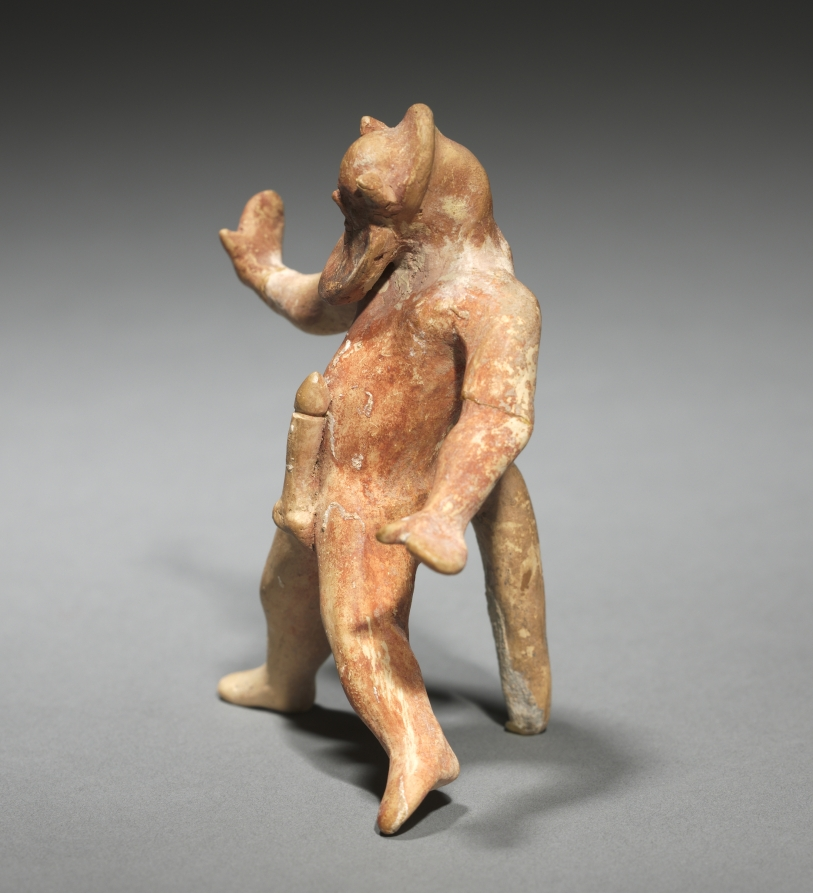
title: Dancing Satyr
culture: Greece, Boeotia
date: 500–475 BCE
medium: painted terracotta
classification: Sculpture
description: Part man and part beast, satyrs were mythical woodland creatures. In art, they were depicted with the ears and tail of a goat or horse, sometimes with hooves, and in a high state of sexual arousal. Satyrs often accompanied Dionysus, the god of wine, in his drinking bouts and other escapades. These three probably once decorated the rim of a large punch-bowl–shaped vessel for serving wine.